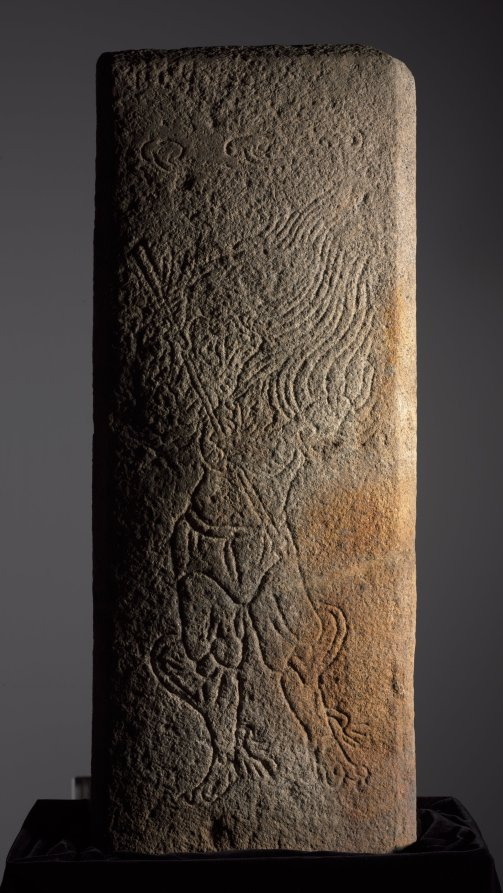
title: Stone Panel for Royal Tomb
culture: Korea, Unified Silla period (676-935)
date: late 700s-early 800s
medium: granite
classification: Sculpture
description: This panel shows a figure with a human body and the features of a rat, which is one of the signs of the Asian zodiac, and is likely one of 12 granite panels from a royal tomb. It is probably from Gyeongju—the capital of the kingdoms of the Silla (57 BCE–668) and Unified Silla (688–935) periods—where large royal tomb mounds can still be found. This panel resembles those showing the animal signs of the Korean zodiac from the tomb of General Kim Yusin (595–673) in Gyeongju, the most famous tomb of the period.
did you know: A rat, one of the signs of the East Asian zodiac, carved in this stone panel symbolizes wealth.